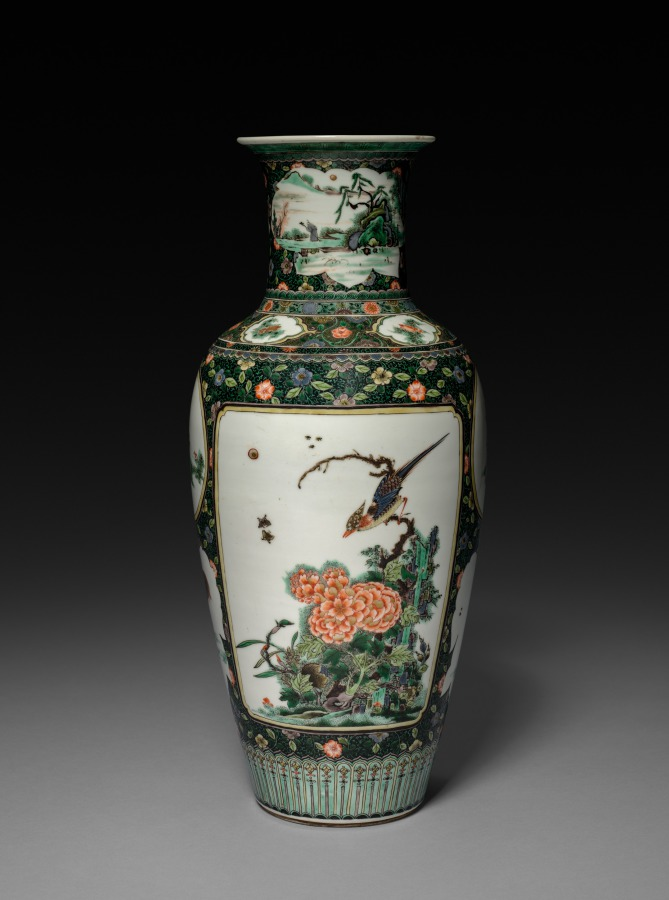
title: Baluster Vase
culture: China, Qing dynasty (1644-1911), Kangxi reign (1661-1722)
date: 1662–1722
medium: porcelain with famille verte overglaze enamel decoration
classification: Ceramic